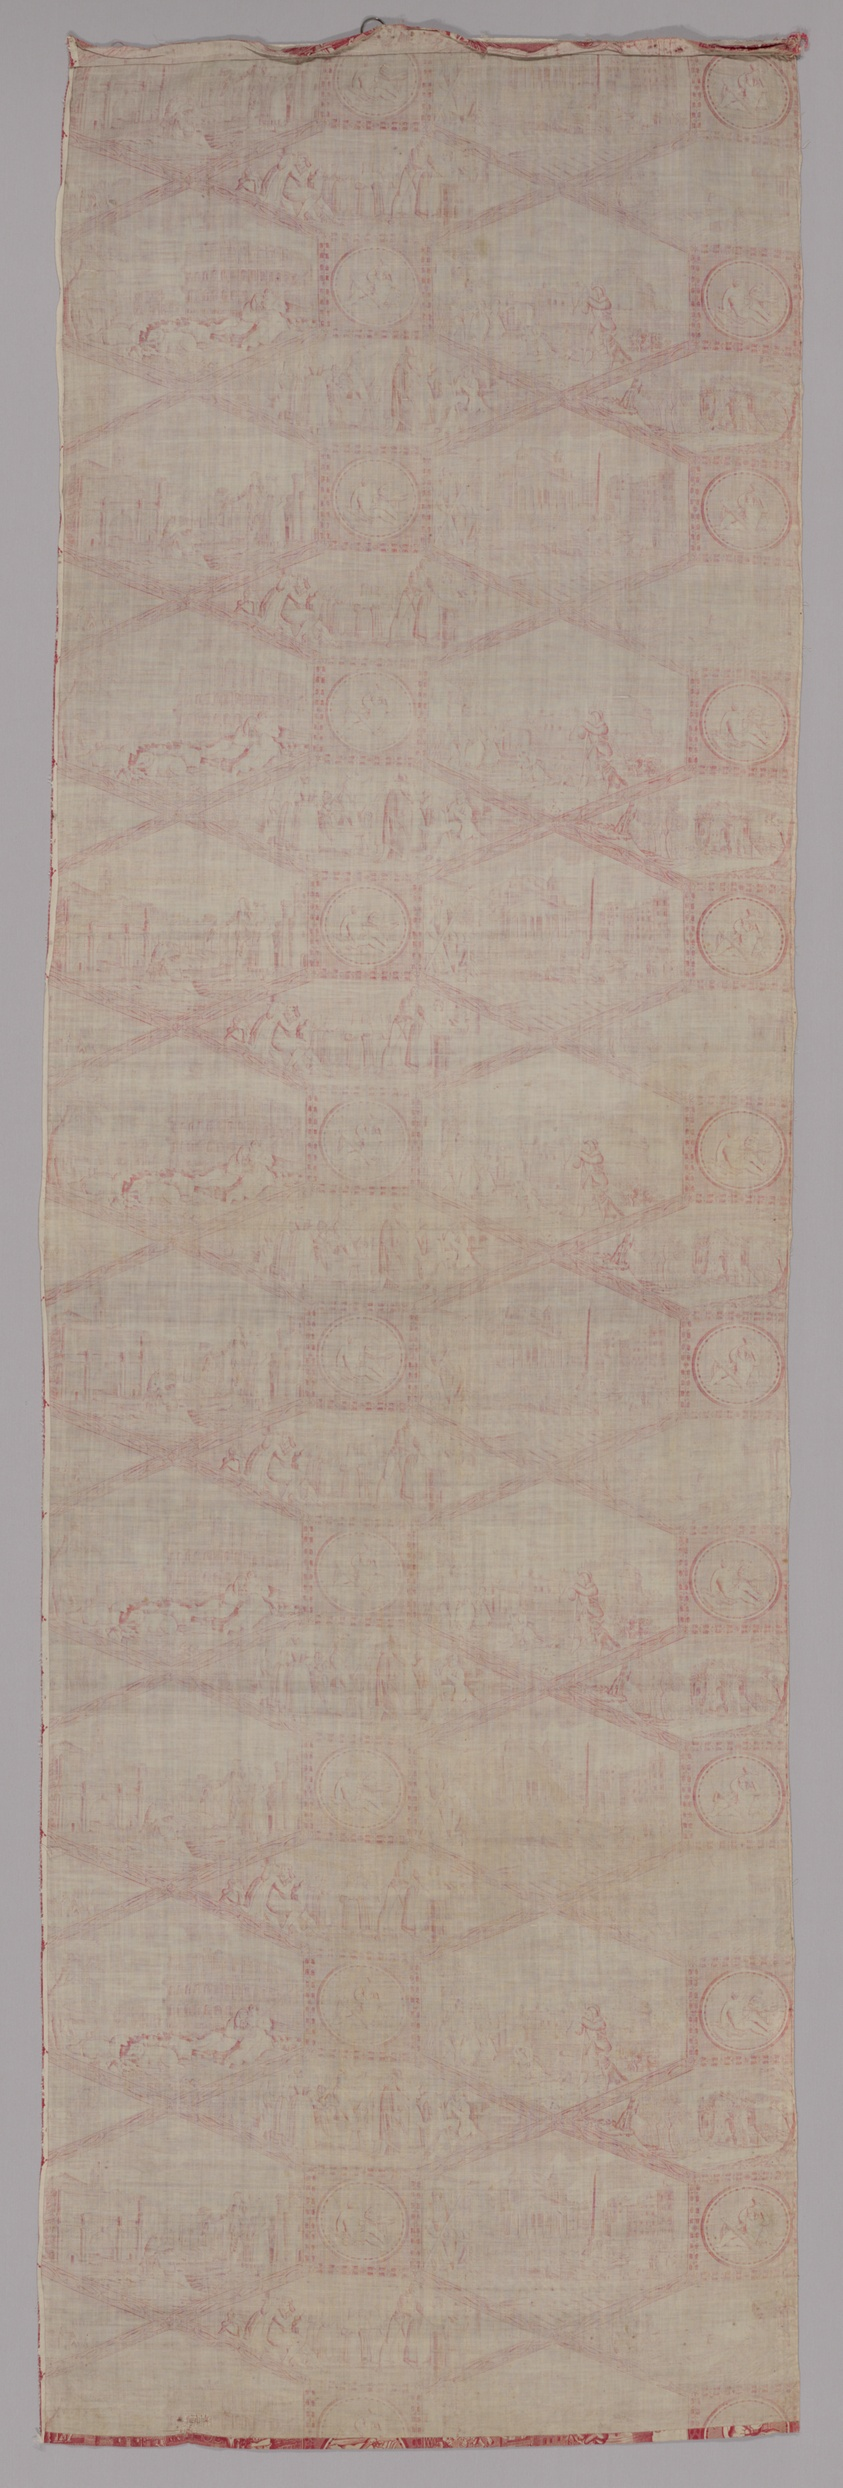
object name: Textile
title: “Scenes of Rome” Furnishing Fabric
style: Neoclassicism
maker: France, Rouen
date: c. 1815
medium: Cotton; engraved roller printed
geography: France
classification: textile; printed textile; furnishing textile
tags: Rome, circles, buildings, people, couples, Italy